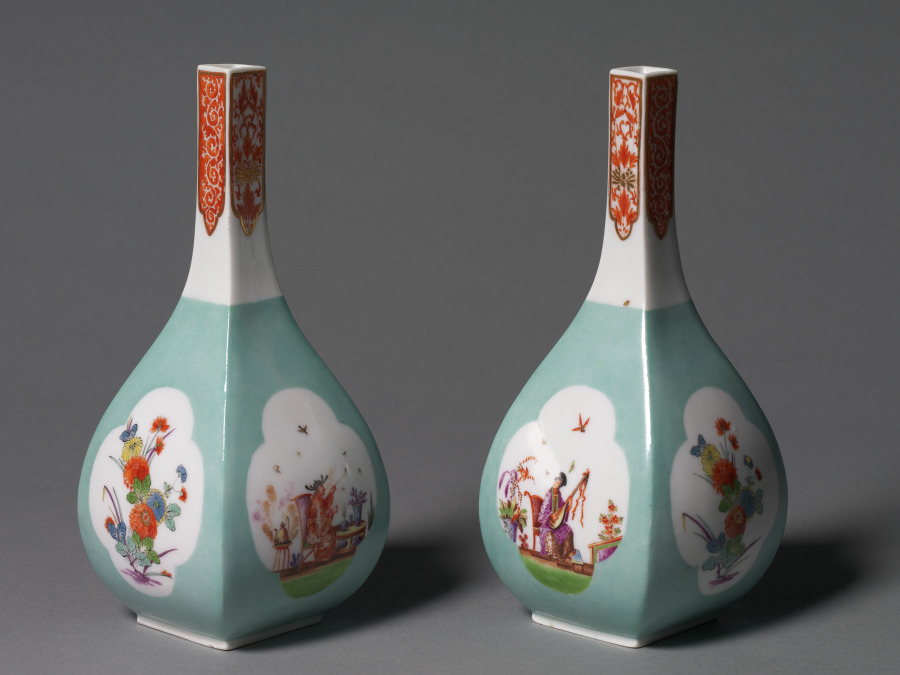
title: Saki Bottles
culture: Germany, Meissen, 18th century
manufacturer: Meissen Porcelain Factory (German, est. c. 1710)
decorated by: probably by Johann Gregor Herold (German, 1696–1775)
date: c. 1730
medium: porcelain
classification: Ceramic